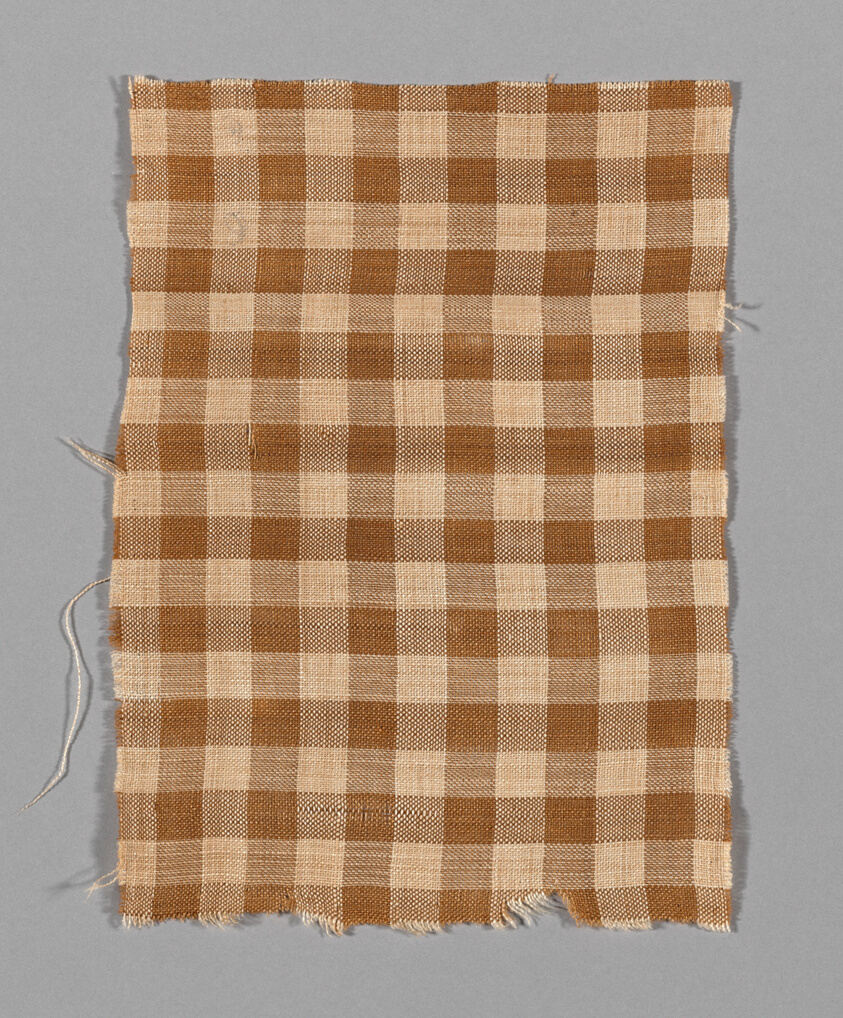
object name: Textile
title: Fragment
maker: United States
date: 1801/25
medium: Sample of stripe and check patterns of blue, white and tan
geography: United States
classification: textile; weaving